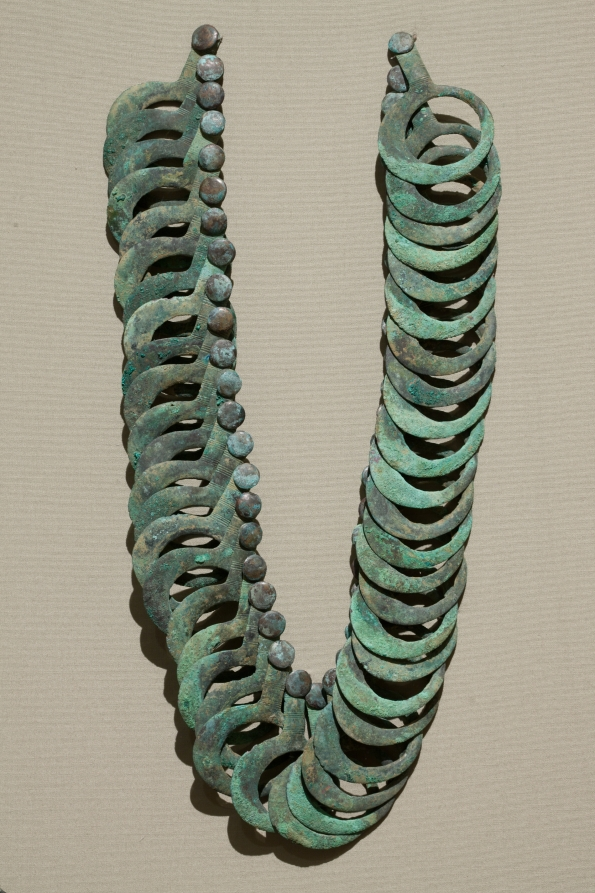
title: Bronze Necklace with Hanging Pendants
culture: Northern Greece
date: 700s BCE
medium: bronze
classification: Jewelry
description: 45 separately cast pendants overlap one another when strung together and hung, reversing course at the bottom.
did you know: The green patina of this bronze necklace is a result of the oxidation process.